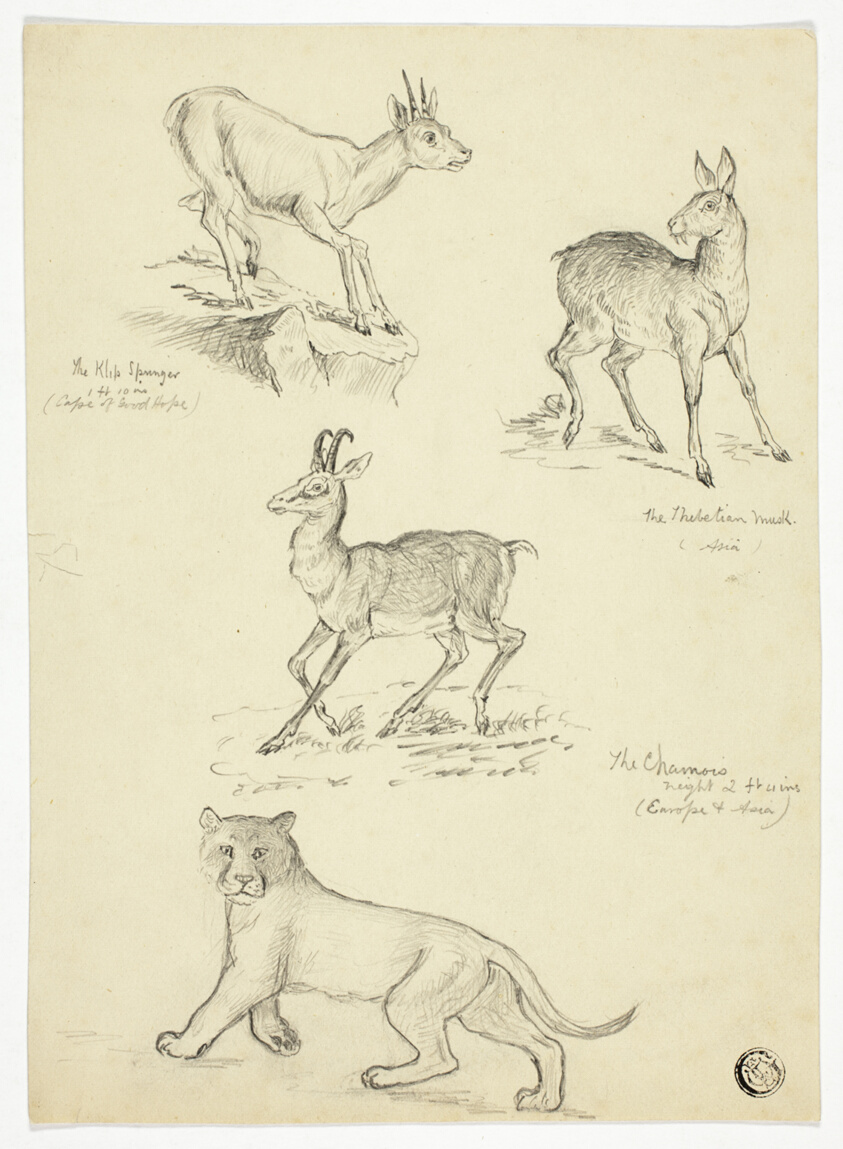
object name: Drawing and Watercolor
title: Chamois, Musk, Klipbok and Lion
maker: Thomas Uwins (English, 1782-1857); or Samuel Howett, Samuel (English, c. 1765-1822)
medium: Graphite on cream wove paper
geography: England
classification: graphite; paper; drawings (visual works); prints and drawing